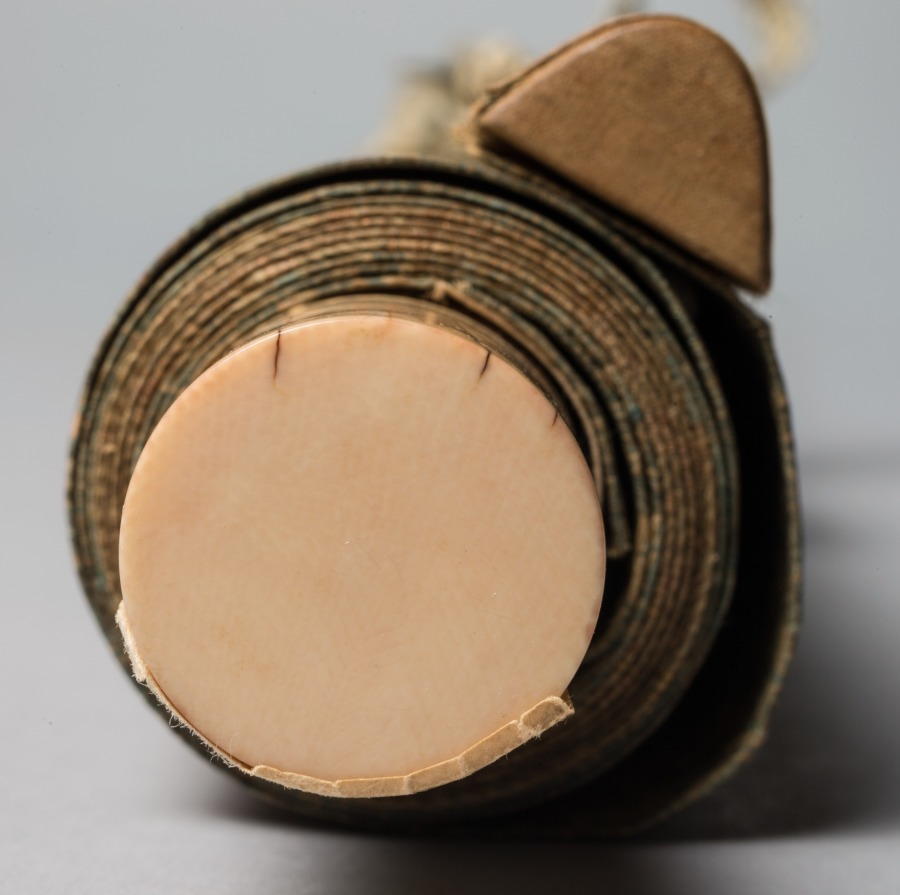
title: Turtle in a Lotus Pond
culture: Japan, Edo period (1615–1868)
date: 1700s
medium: hanging scroll; ink on paper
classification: Painting